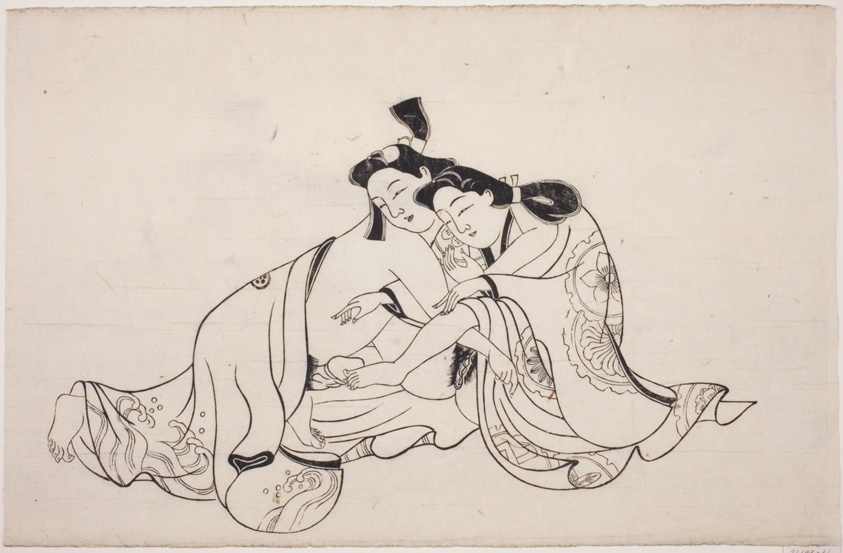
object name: Print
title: A sheet from a shunga album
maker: Japanese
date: 1679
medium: Woodblock print; sumizuri-e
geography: Japan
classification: print